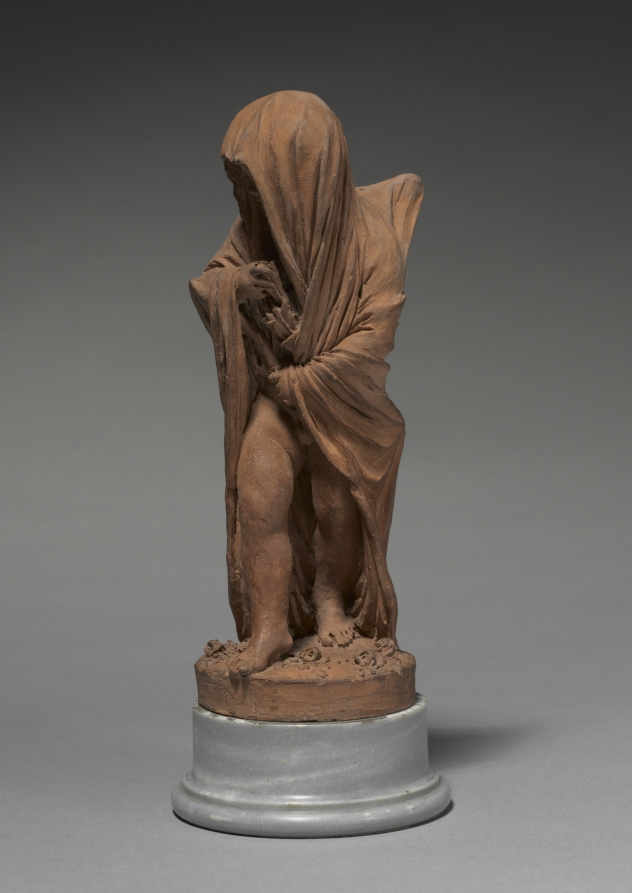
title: Cupid Secretly Drawing an Arrow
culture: Belgium, Brussels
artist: Gilles-Lambert Godecharle (Belgian, 1750–1835)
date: 1807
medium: terracotta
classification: Sculpture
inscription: inscribed on the edge of the base at right: "Godecharle" and "1807."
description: This clay model is a maquette for a sculpture in limestone more than three feet tall, entitled Cupid Disguised, Hiding Under a Veil. The motif is borrowed from the Marlborough cameo (an ancient Roman cameo now at the Museum of Fine Arts, Boston, inv. no. 99.101) that was a source of inspiration for neoclassical artists. The gem illustrates the wedding of Cupid and Psyche—shown as veiled children with protruding wings—from which Godecharle extracted the single figure of Cupid and, instead, depicted him in ambush.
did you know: Cupid traipses daintily on rose blossoms, ready to shoot his love-filled arrow at an unsuspecting victim.